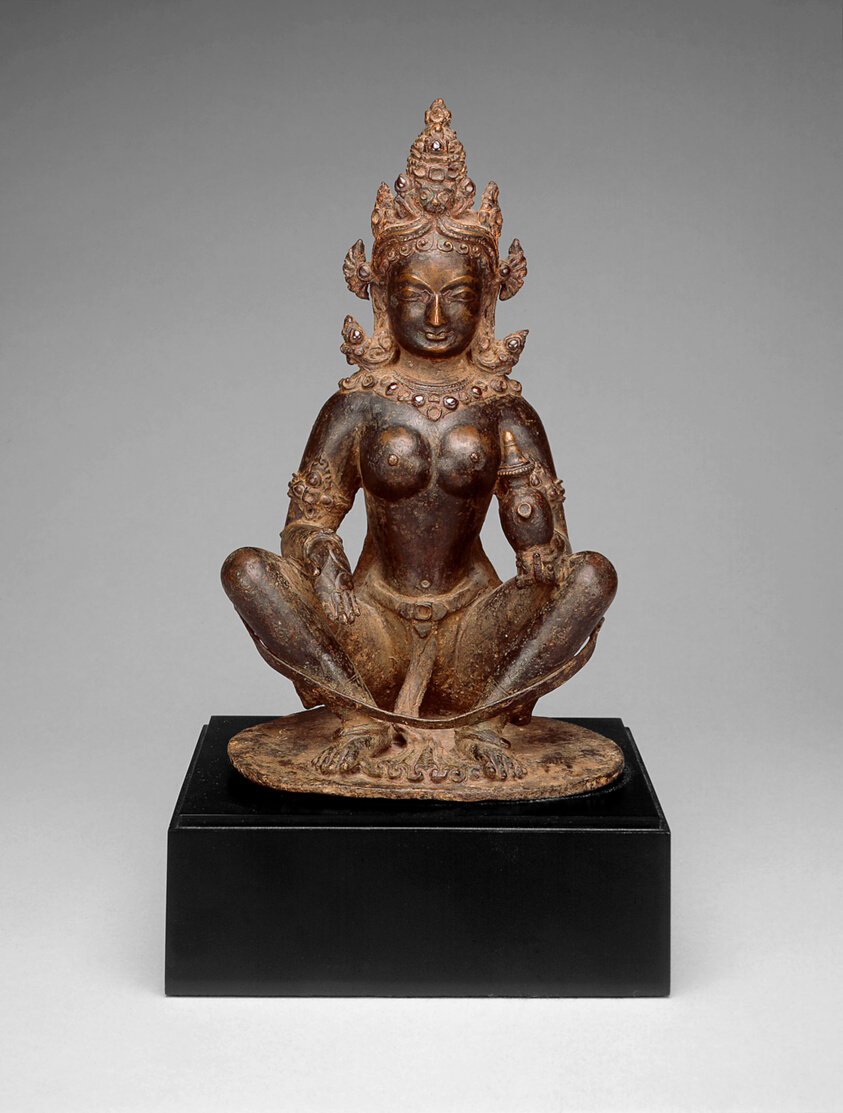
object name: Sculpture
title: Mother Goddess Brahmani Seated in a Yogic Posture Holding a Water Pot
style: Himalayan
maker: Nepal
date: 13th century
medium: Copper alloy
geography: Nepal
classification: copper; metal; sculpture; asian art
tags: goddesses